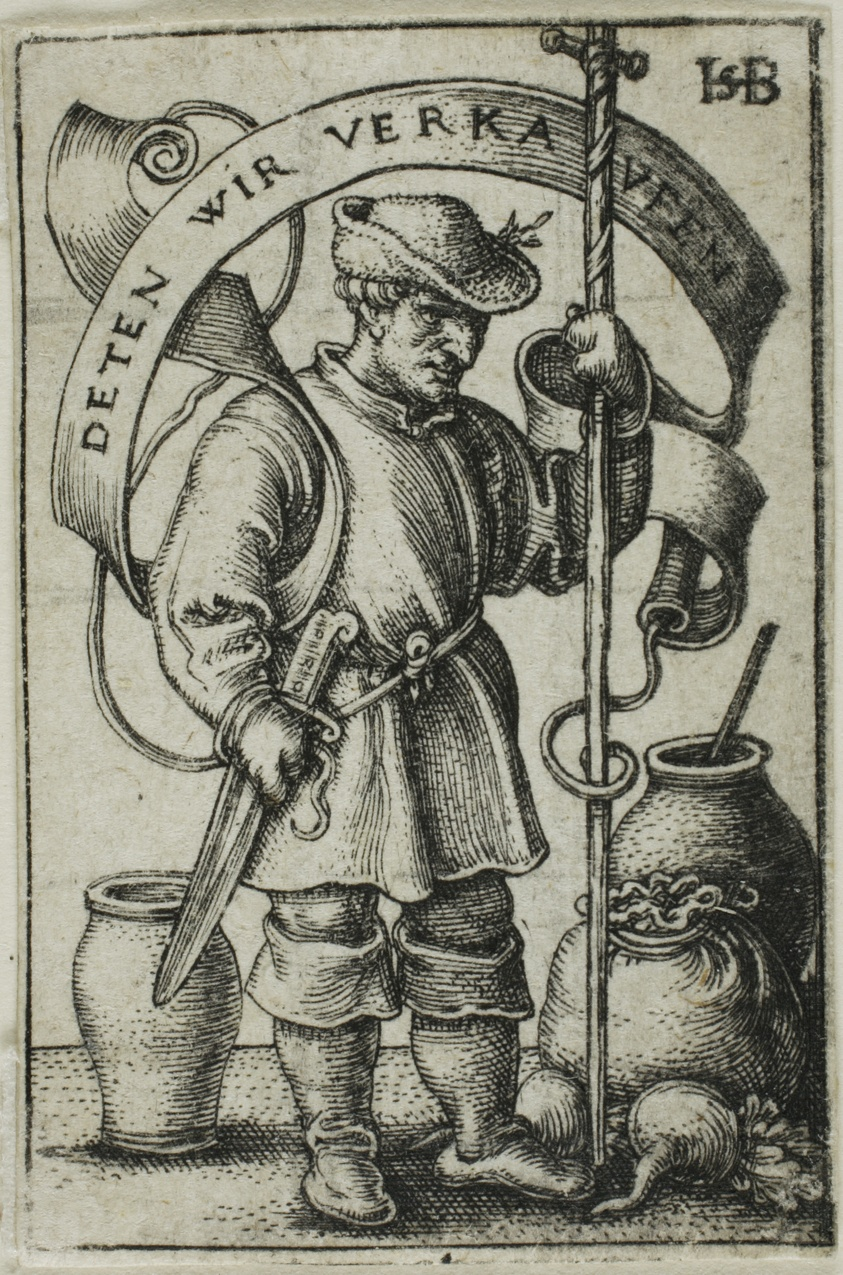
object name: Print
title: The Market Peasant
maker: Sebald Beham; German, 1500-1550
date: c. 1542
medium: Engraving in black on ivory laid paper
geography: Germany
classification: print; prints and drawing